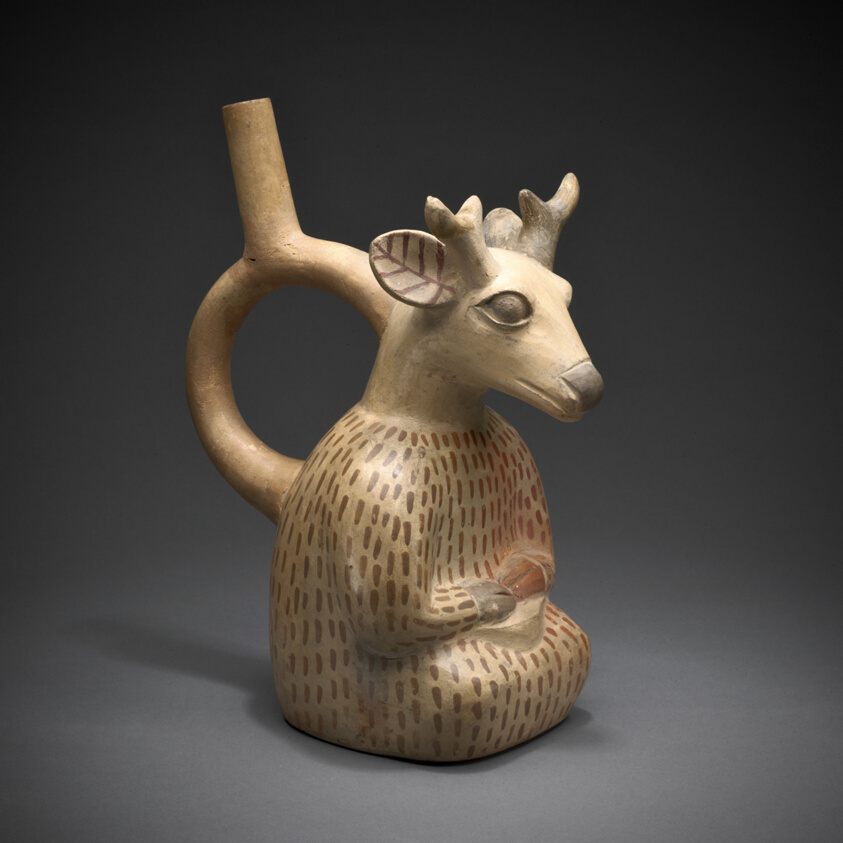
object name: Vessel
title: Vessel in the Form of a Deer Impersonator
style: moche, americas, andes, Arts of the Americas, andean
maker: Moche (Chimbote, Santa Valley, north coast, Peru)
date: 100 BCE–500 CE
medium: Ceramic and pigment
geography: Santa Valley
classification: earthenware; ceramics; vessel; art of the americas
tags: impersonation, animals, sacrifice, deers, anthropomorphic figure